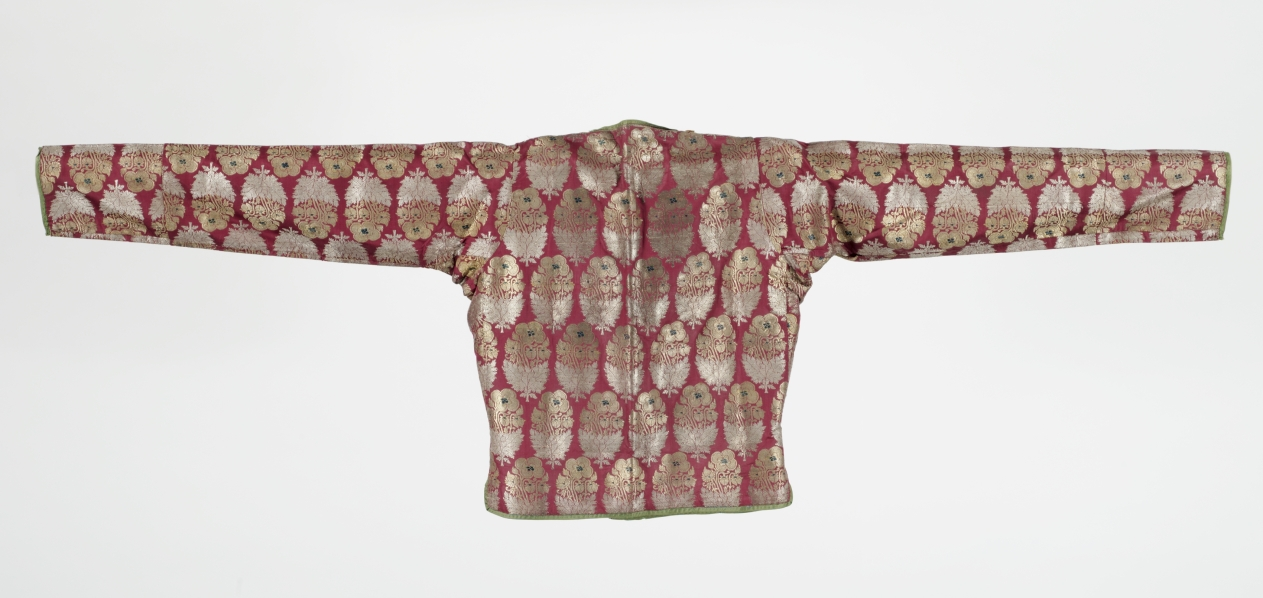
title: Jacket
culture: India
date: 1800s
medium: silk, metal threads, cotton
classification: Garment